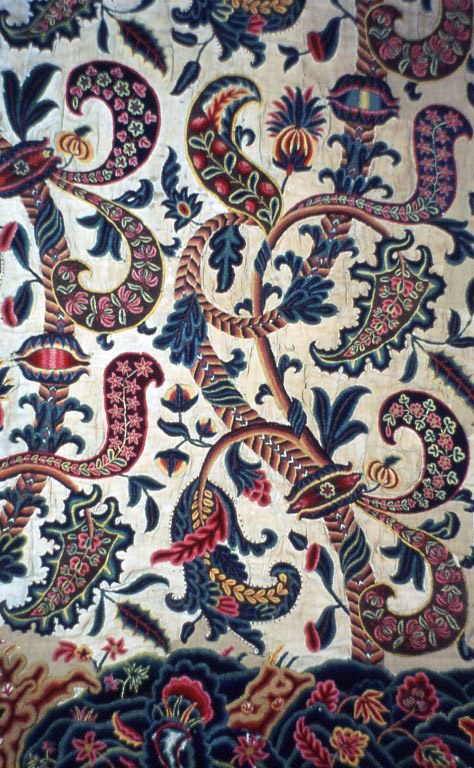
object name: Textile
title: Panel (Needlework)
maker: England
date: 1675/1700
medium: Linen and cotton, twill weave; embroidered with wool in long, short, running, satin, and stem stitches; block shading; French knots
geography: England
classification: textile; needlework (visual works)